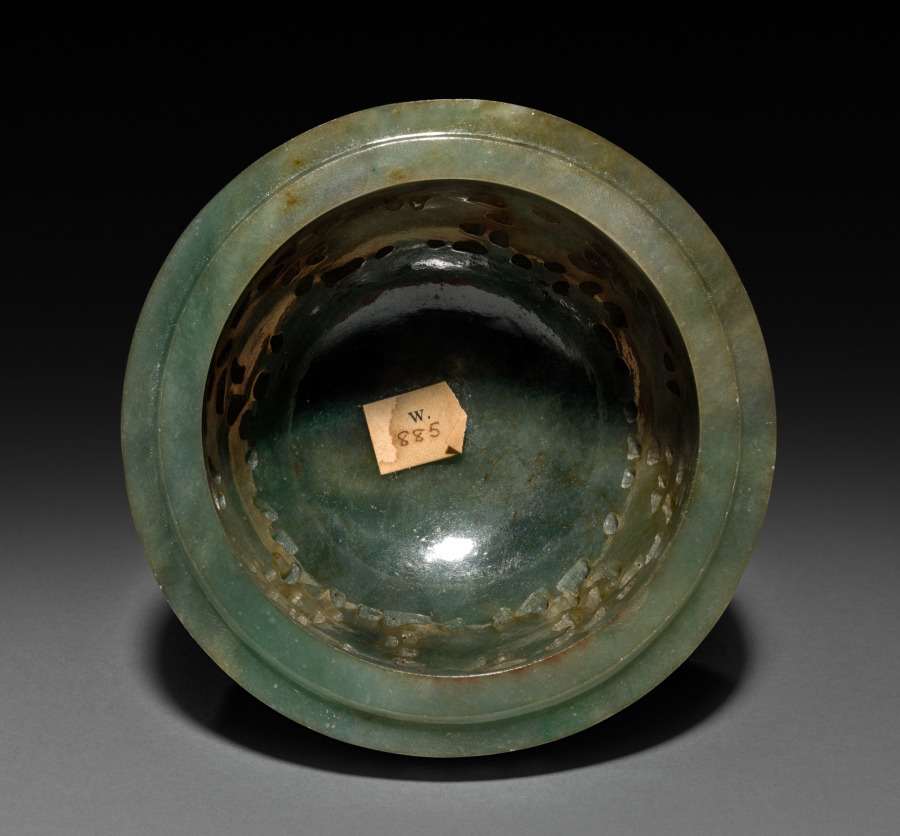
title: Koro (lid)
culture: China, Qing dynasty (1644–1911), Qianlong reign (1736–95)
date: 1736–95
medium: jade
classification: Jade